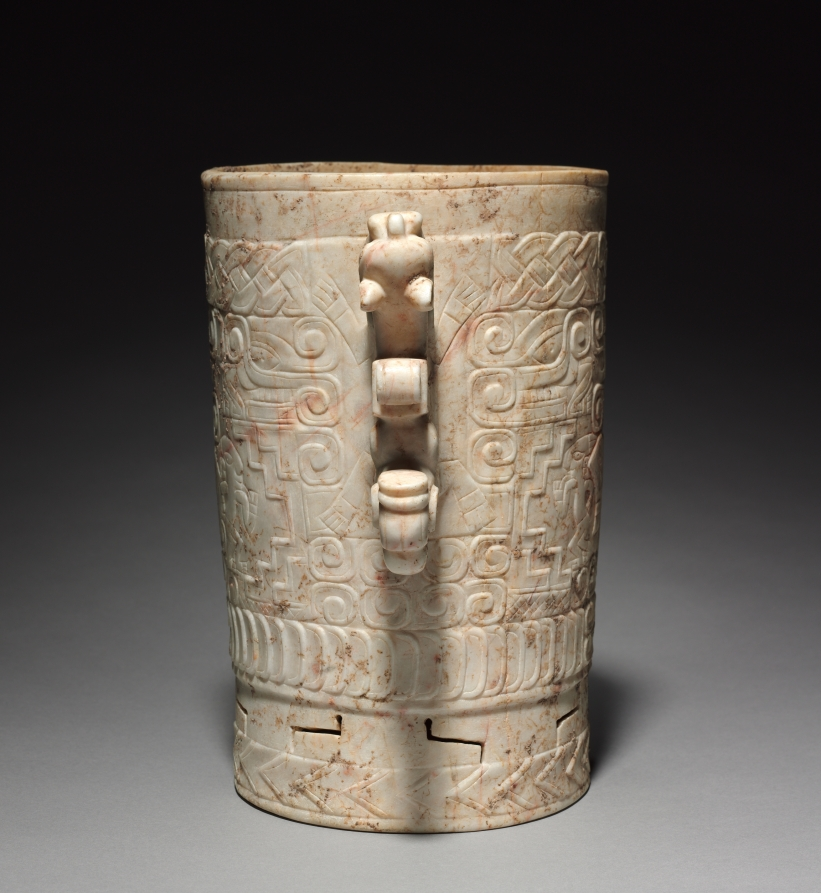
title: Carved Stone Vessel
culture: Northwest Honduras, Ulúa Valley, 8th-10th century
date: 700–1000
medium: marble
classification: Sculpture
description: This stone vessel, made by eastern neighbors of the Maya, is one of the finest and largest of its kind. On the exterior are several motifs that combine to create an unusually complex design that features a grotesque head, either in profile or front-facing, with a leg near its mouth. In the main panel a frontal version of the head hovers over two legs, the knees pointed sharply outward. Beside each leg is a lively human, rarely seen in such works. Little is known about the motifs’ meanings or the vessel’s use.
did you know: Carved in the round, the vessel's handles suggest a feline that emerges from a serpent-like head with an upturned snout.